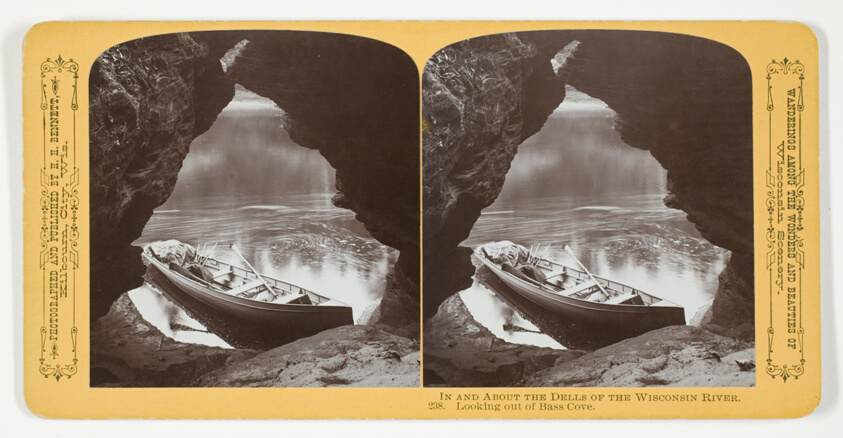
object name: Photograph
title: Looking out of Bass Cove, No. 238 from the series "In and About the Dells of the Wisconsin River"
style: 19th century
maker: Henry Hamilton Bennett (American, born Canada, 1843-1908)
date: 1870/1908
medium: Albumen print, stereo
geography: Wisconsin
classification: photography; photograph; albumen silver print; stereograph (albumen)